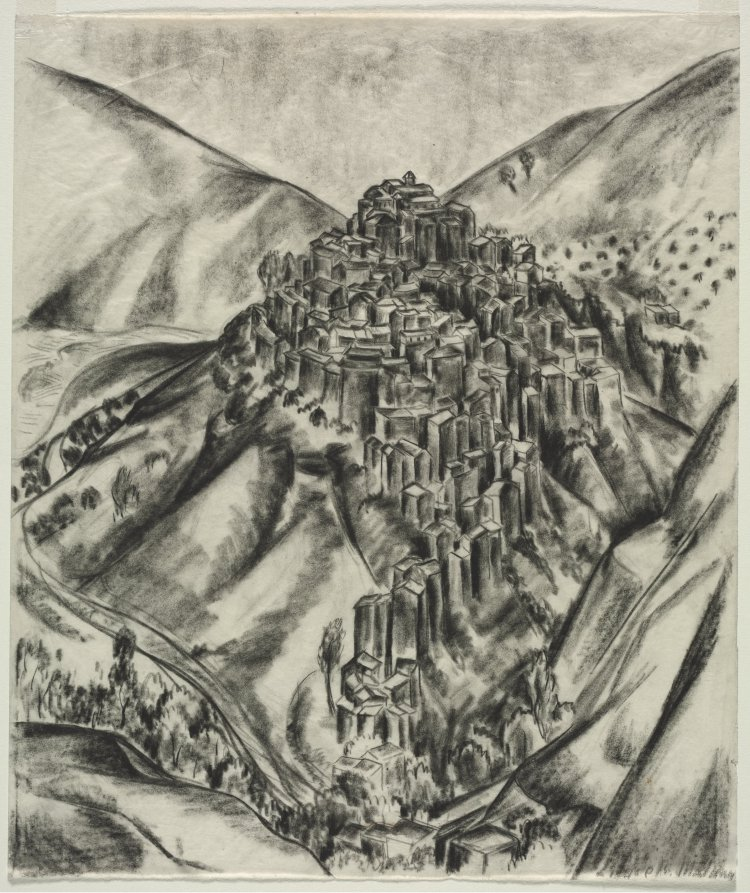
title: An Italian Hilltown, Anticoli, Italy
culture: America, Ohio, Cleveland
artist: Louise B. Maloney (American, 1887–1973)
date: c. 1930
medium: charcoal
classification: Drawing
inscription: signed, lower right, in graphite: Louise B. Maloney